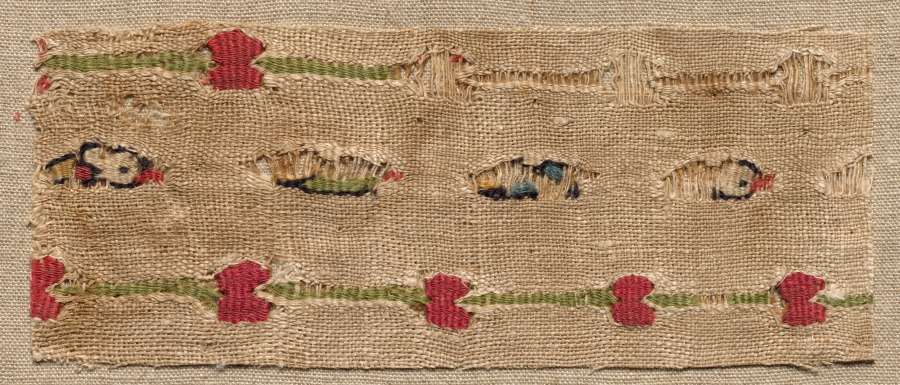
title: Fragment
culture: Egypt, Byzantine period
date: 400s - 650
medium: tabby weave with interwoven tapestry ornament, linen and wool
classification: Textile